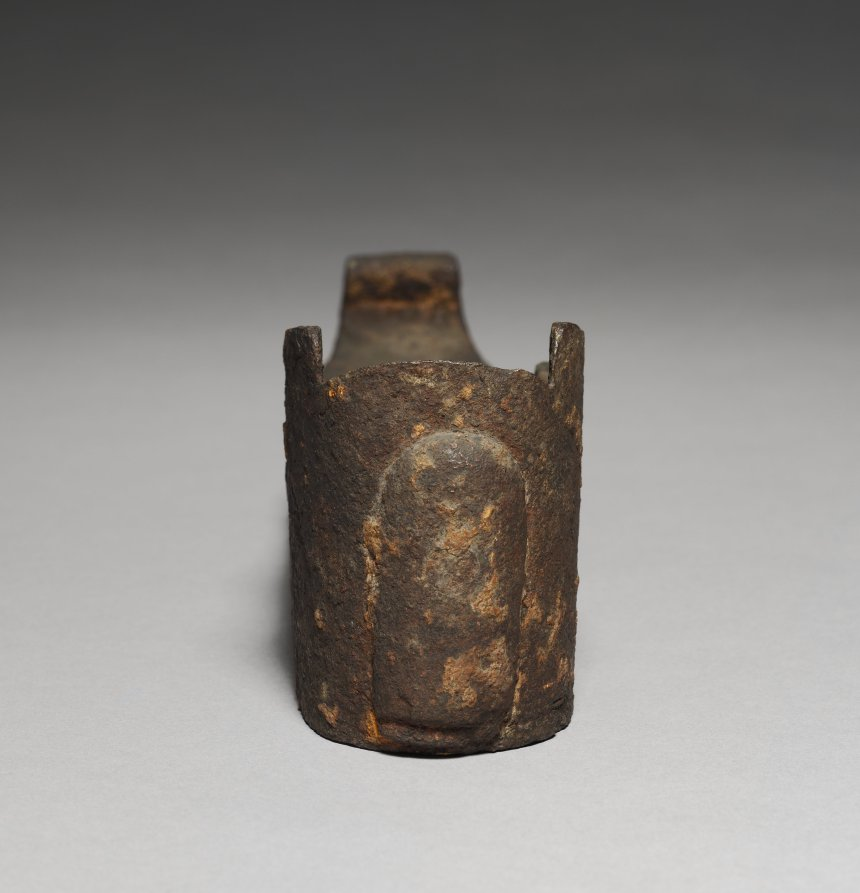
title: Carpenter's Plane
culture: Italy, 15th century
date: 1400s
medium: wood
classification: Tool